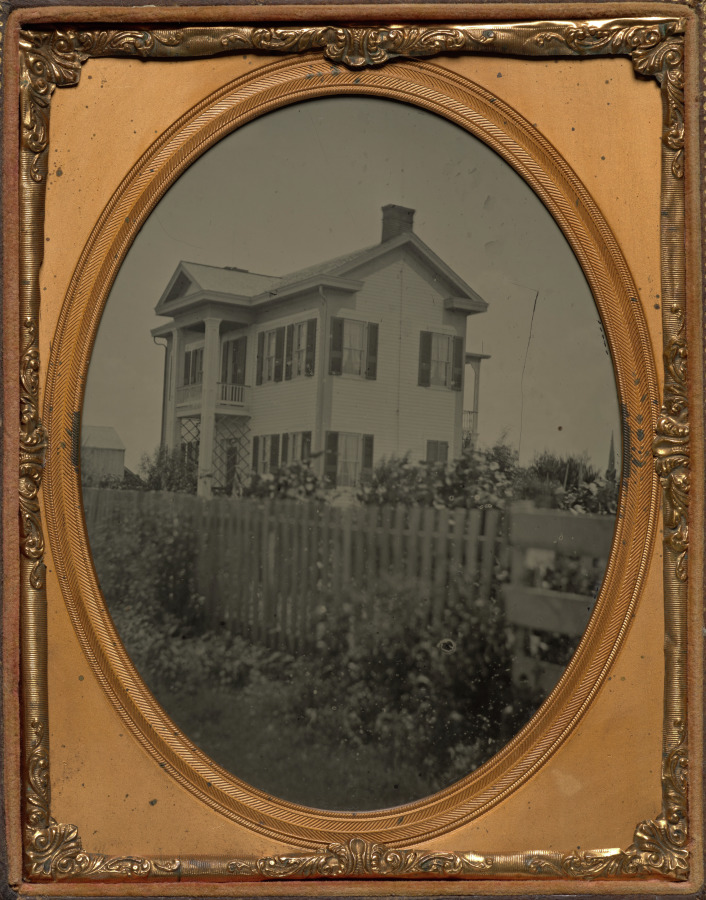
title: Homestead with picket fence and flowers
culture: America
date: c. 1857–65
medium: ambrotype, half plate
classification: Photograph